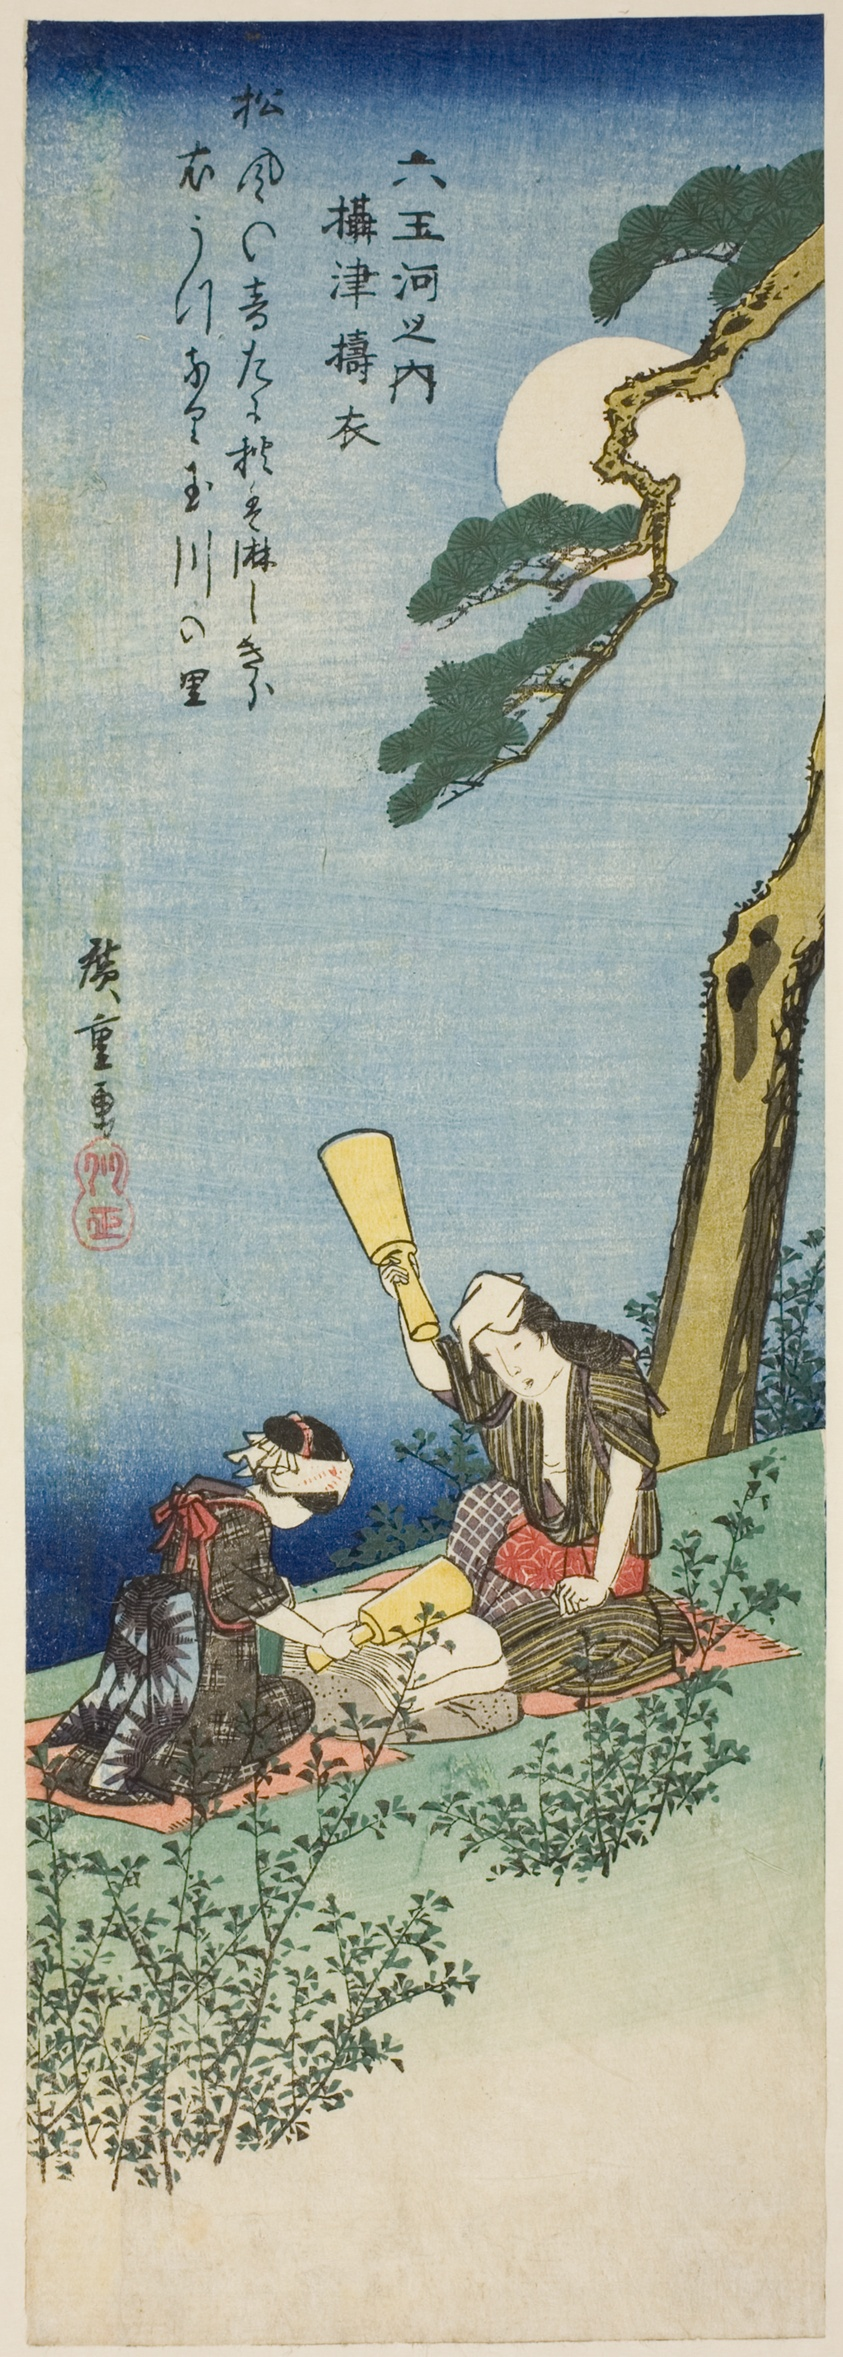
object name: Print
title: Kinuta Jewel River in Settsu Province (Settsu Kinuta), from the series "Six Jewel Rivers (Mu Tamagawa no uchi)"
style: Japanese (culture or style)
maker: Utagawa Hiroshige 歌川 広重; Japanese, 1797-1858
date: c. 1835/39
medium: Color woodblock print; chutanzaku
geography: Japan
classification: print; asian art